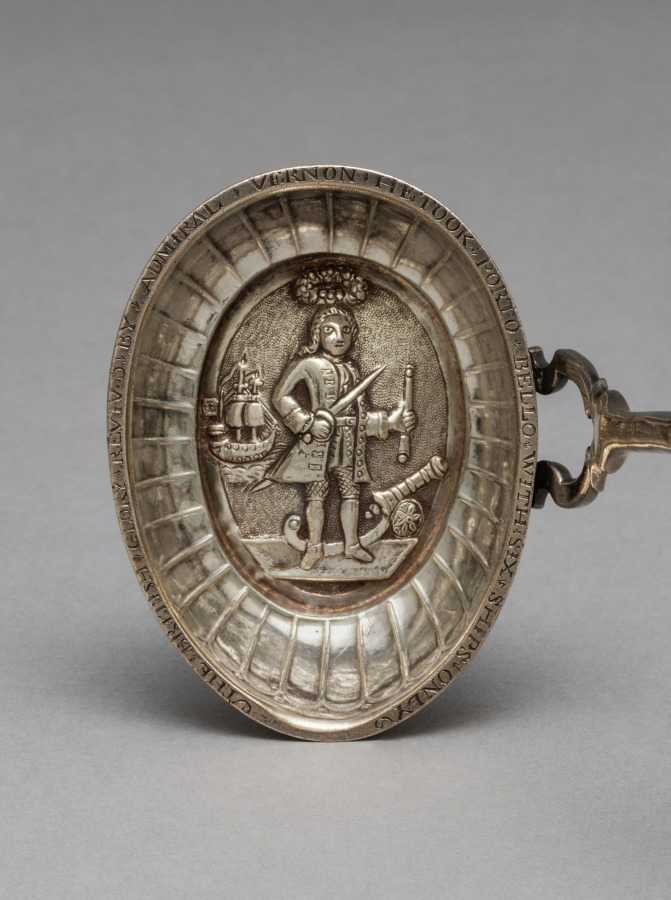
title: Ladle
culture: England, Exeter, 18th century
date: 1741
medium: silver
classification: Silver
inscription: engraved around edge: "The British Glory reviv'd by Admiral Vernon. He took Porto Bello with six ships only."